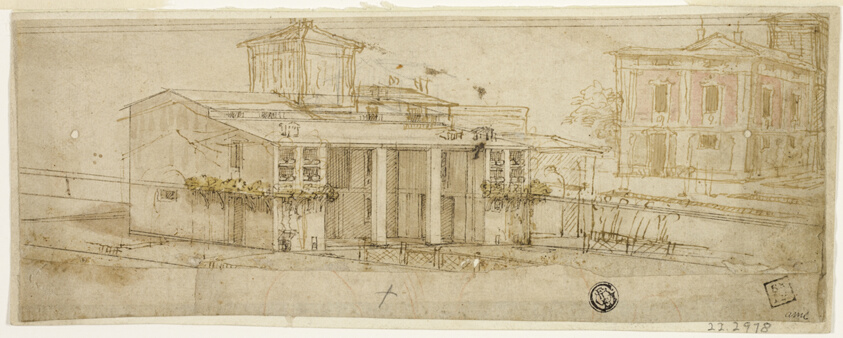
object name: Drawing and Watercolor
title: Sketches of Tuscan Villas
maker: Attributed to Bernardo Buontalenti, called delle Girandole, or his circle; Italian, 1536-1608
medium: Pen and brown ink with brush and brown and pink wash, over traces of graphite, on ivory laid paper, pieced and laid down on ivory laid paper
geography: Italy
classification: pen and ink drawings; drawings (visual works); prints and drawing